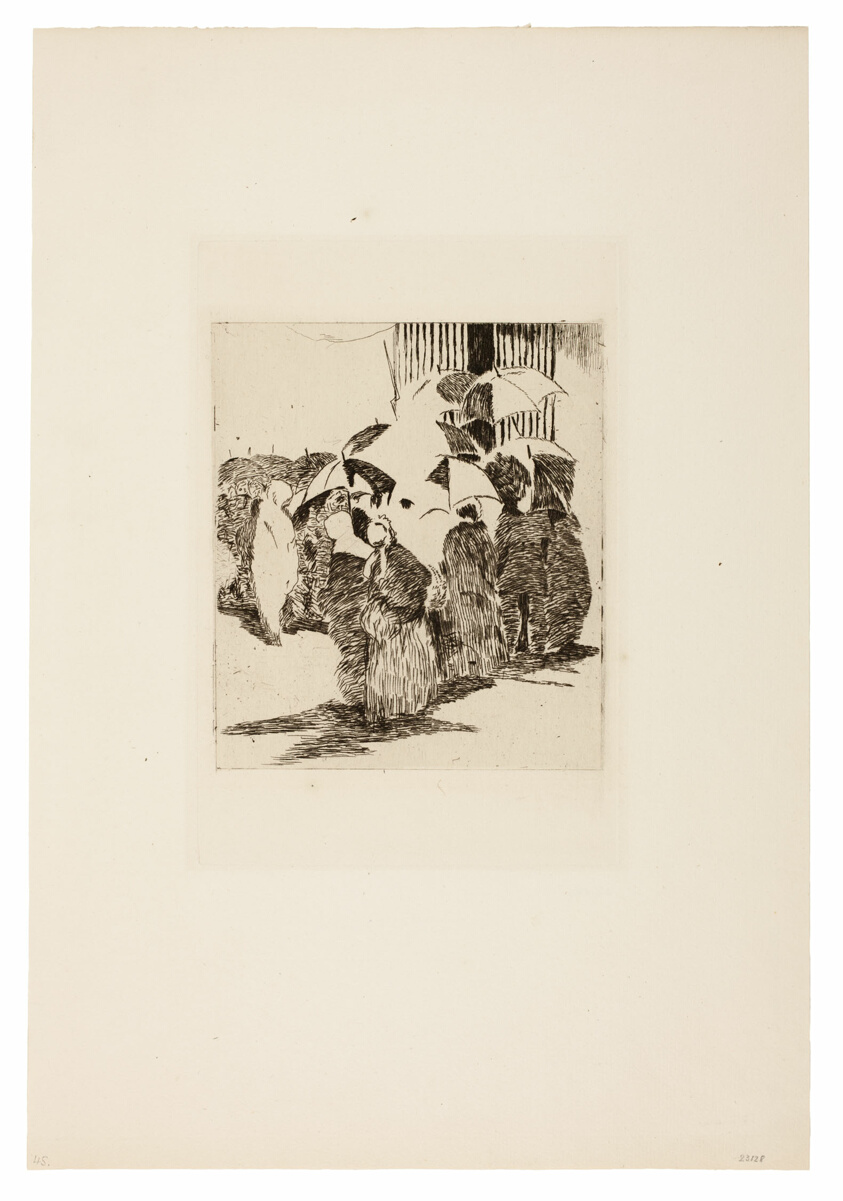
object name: Print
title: Line in Front of the Butcher Shop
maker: Édouard Manet (French, 1832-1883); published by Alfred Strölin (Swiss, 19th-20th centuries)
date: 1870–71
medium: Etching in warm black on buff laid paper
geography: France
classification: etching; print; prints and drawing